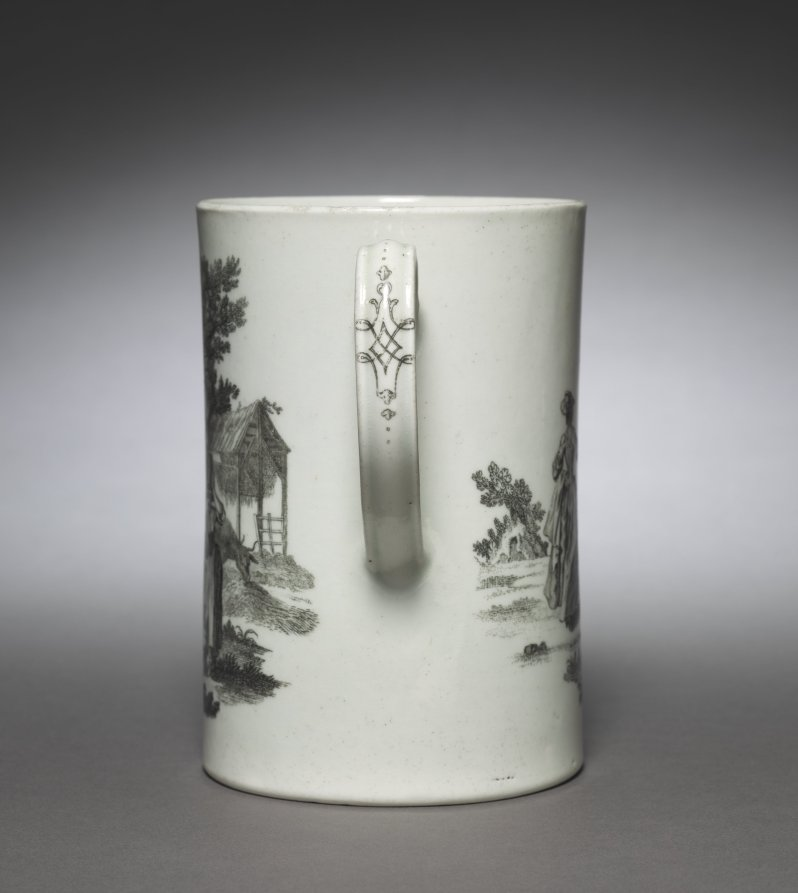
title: Cann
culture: England, 18th century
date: c. 1770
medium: ceramic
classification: Ceramic